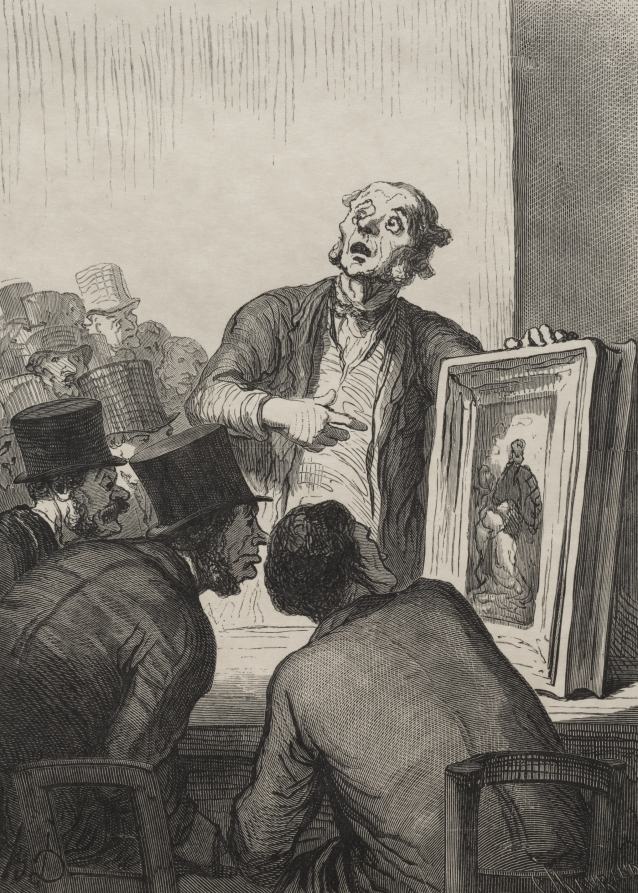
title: The Auction House: The Expert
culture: France, 19th century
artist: Honoré Daumier (French, 1808–1879)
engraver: Charles Maurand (French, 1824–1904)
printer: François Louis Schmied (Swiss, 1873–1941)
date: 1863, printed 1920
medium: wood engraving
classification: Print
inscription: Lower margin, pencil: 42/75 ; red stamp: FLS